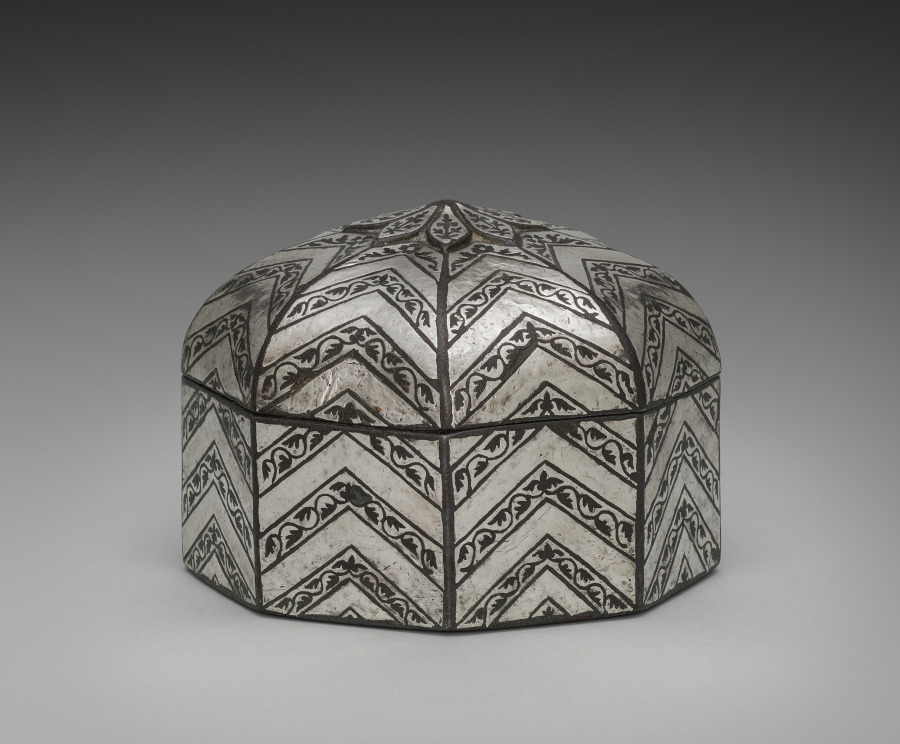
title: Bidri Pandan with Chevrons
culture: Southwestern India, Deccan, Karnataka, Bidar​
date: c. 1700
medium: Zinc alloy with silver overlay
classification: Metalwork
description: A pandan is a lidded vessel for serving paan, which has been enjoyed in India for more than two thousand years. Paan is betel or areca nut mixed with lime powder, aromatics such as clove cinnamon, or cardamom, and wrapped in betel leaf. The whole packet is chewed after a meal as a mild stimulant and mouth freshener.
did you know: The lime powder in paan functioned as an ancient antacid after meals.